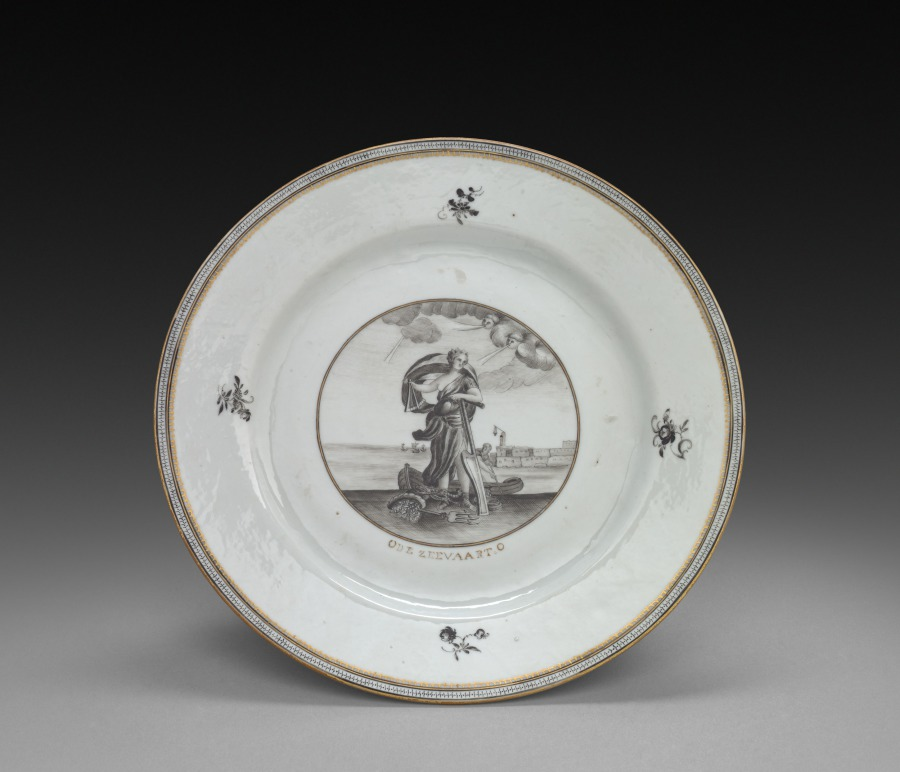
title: Plate: Female Figure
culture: China, Chinese Export, 18th century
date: 1700s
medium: porcelain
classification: Ceramic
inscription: below the figure: "ODE ZEEVAARTO."